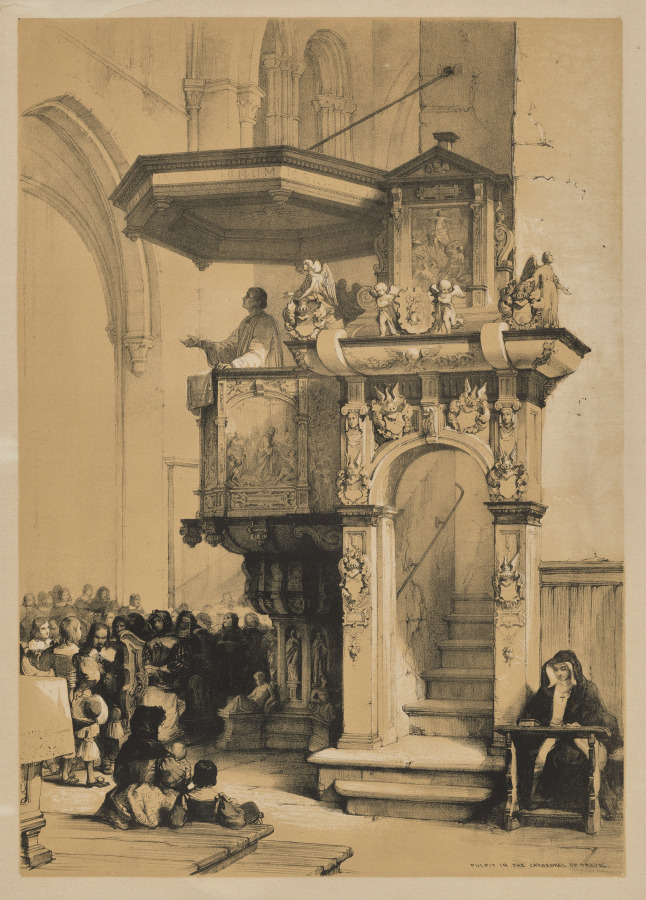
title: Sketches in Belgium and Germany, First Series, Pulpit in the Cathedral of Treves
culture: England, 19th century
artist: Louis Haghe (British, 1806–1885)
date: 1845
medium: lithograph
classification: Print